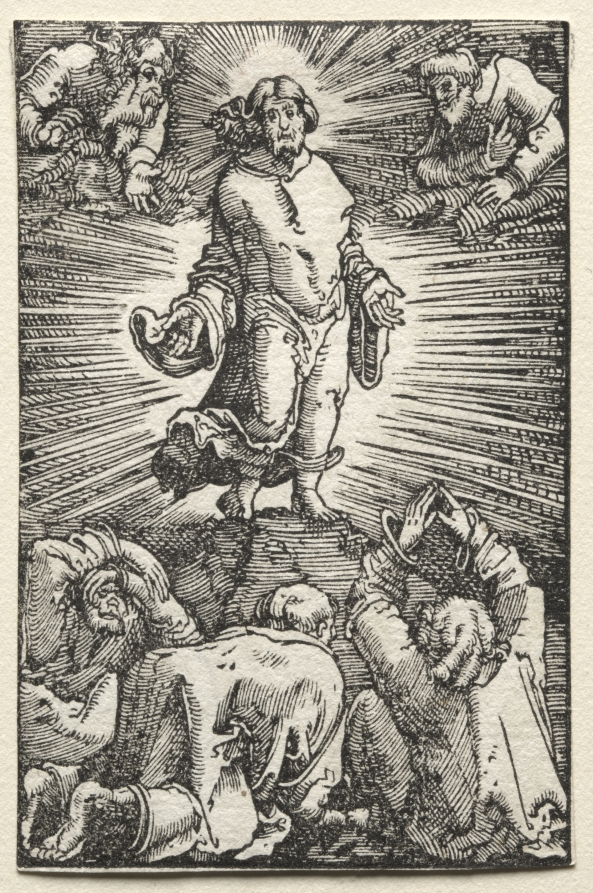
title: The Fall and Redemption of Man: The Transfiguration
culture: Germany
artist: Albrecht Altdorfer (German, c. 1480–1538)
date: c. 1515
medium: woodcut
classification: Print